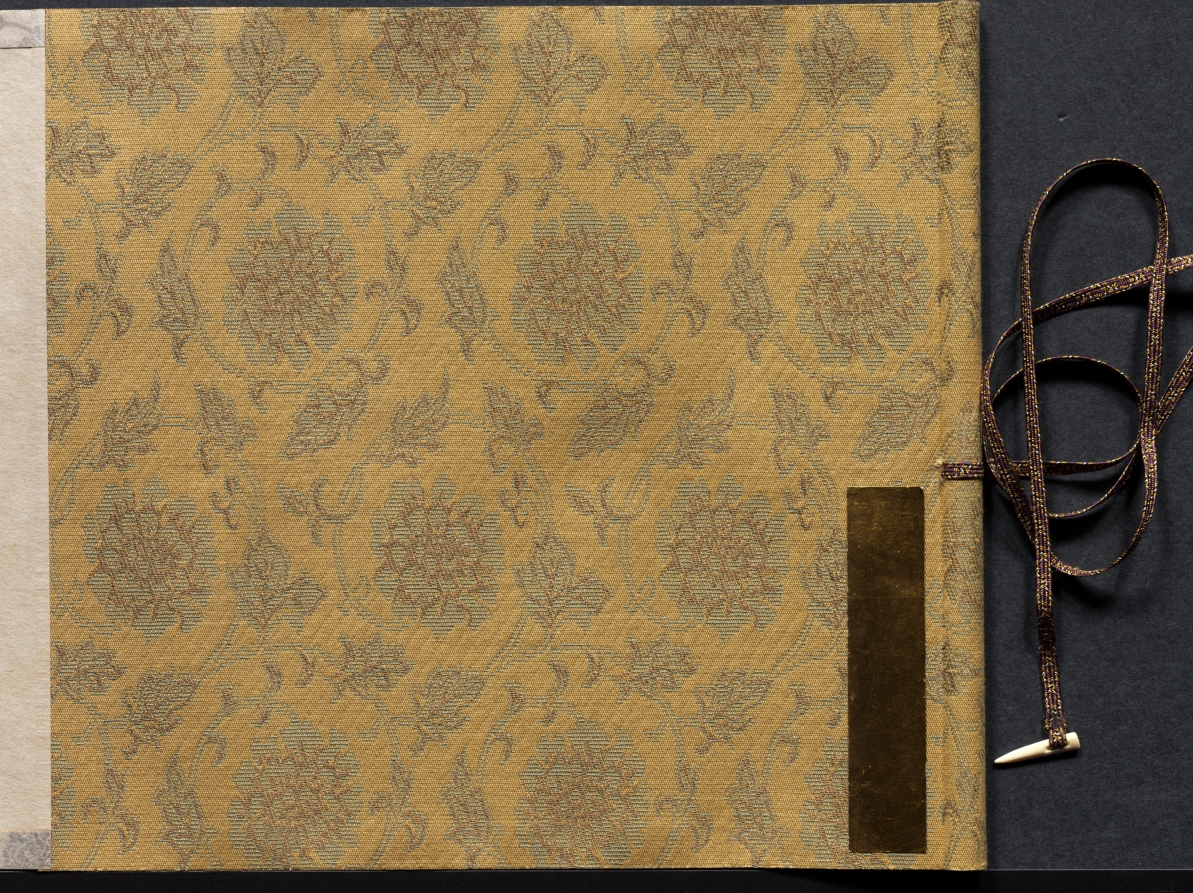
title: The Illustrated Tale of Oishi Hyōroku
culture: Japan, Edo period (1615–1868)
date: 1700s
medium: handscroll; ink and color on paper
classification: Painting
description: This incomplete handscroll illustrates part of the story of Oishi Hyoroku, a young man tasked with battling fox apparitions who were creating problems in his town. In other extant versions of the scroll, the story is set in the fall of 1624 in Kagoshima in southern Japan. Throughout the story, Hyoroku is tricked and terrified by the foxes that shift their shapes into a variety of monstrous phantoms. After repeated humiliations, he eventually captures two of the foxes. In this version, colloquial texts that function like text blurbs in comics appear throughout the scroll, but the main text is missing.